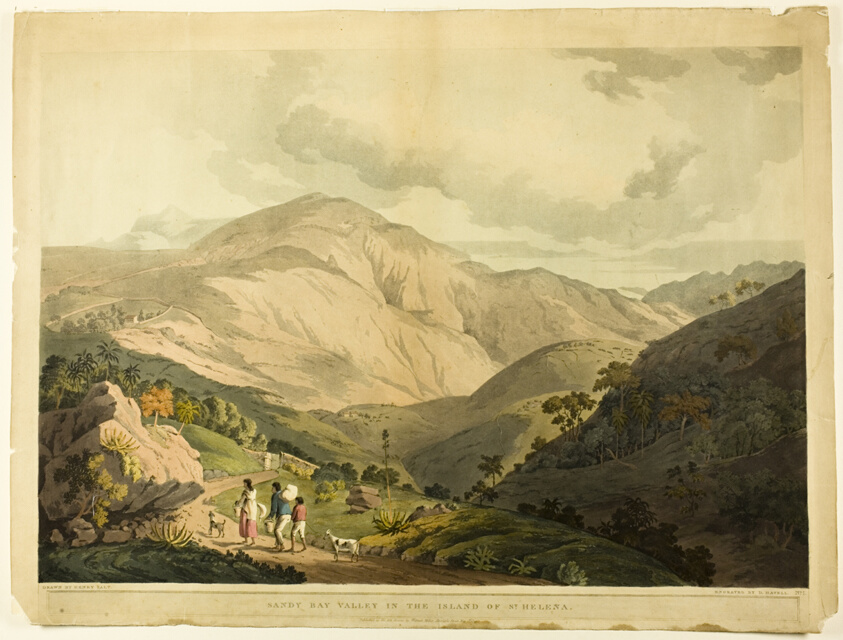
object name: Print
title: Sandy Bay Valley, St. Helena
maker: Daniel Havell (English, 1785-1826); after Henry Salt (English, 1780-1827)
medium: Aquatint and etching on paper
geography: England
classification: aquatint; print; prints and drawing